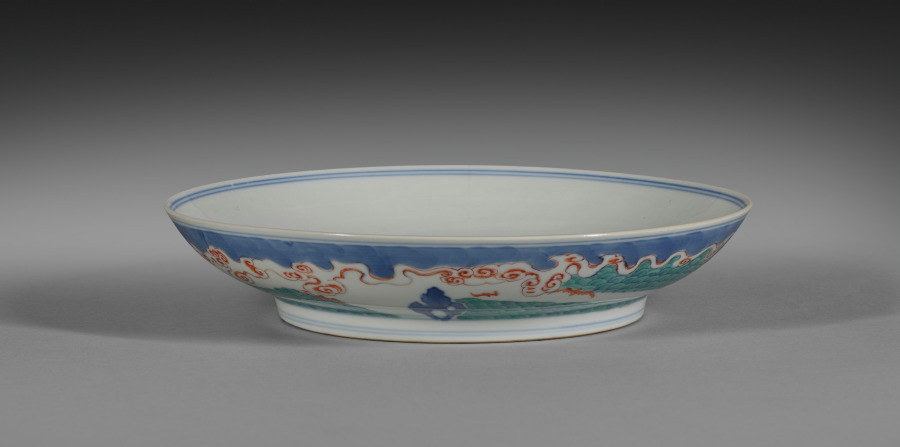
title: Plate with Isle of the Immortals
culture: China, Jiangxi province, Jingdezhen kilns, Qing dynasty (1644-1911), Yongzheng mark and reign (1723-35)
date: 1723–35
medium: porcelain decorated in underglaze cobalt blue and overglaze enamels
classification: Ceramic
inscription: 大清雍正年製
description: This multicolored dish is decorated with the sacred isle, also seen on the exterior of the blue-and-white dish nearby. A pavilion emerges amid rising and falling waves, a symbol of constant transformation and change. Above the waves are mysterious clouds, symbolizing the cosmic vital energy (qi) that animates all things and beings on earth in Daoism. The interior of the dish also shows cranes carrying sticks in their beaks, a motif that symbolizes longevity. Cranes carrying sticks above a pavilion in the sea express the wish “May you live to a ripe old age (haiwu tianchou; 海屋添籌).”